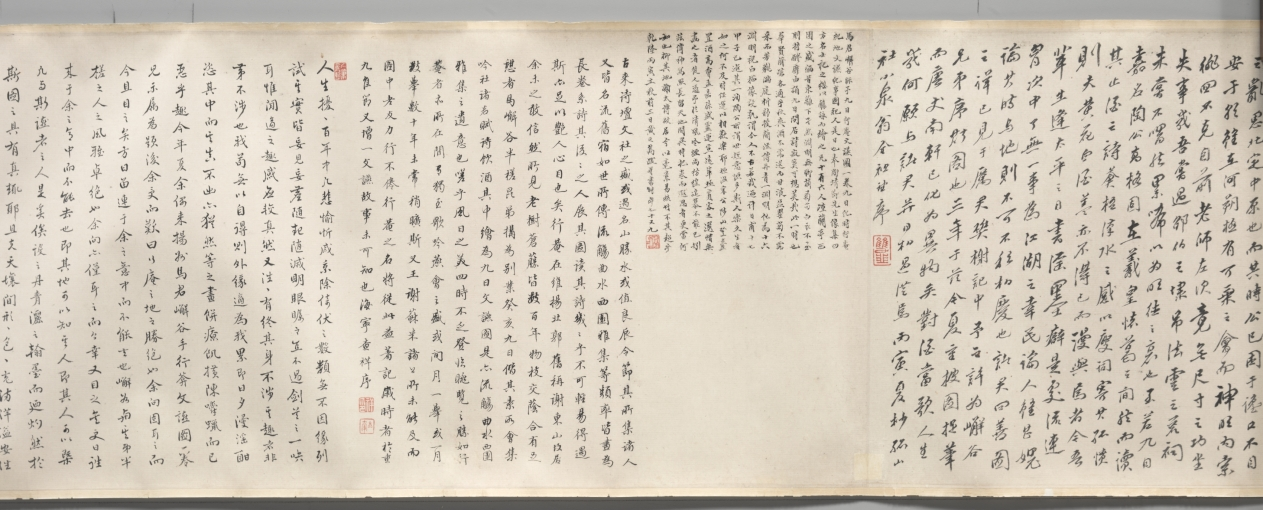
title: The Ninth Day Literary Gathering at Xing’an [Temporary Retreat]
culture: China, Qing dynasty (1644-1911)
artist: Fang Shishu (Chinese, 1693–1751)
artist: and Ye Fanglin (Chinese, active late 1600s–mid-1700s)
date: 1743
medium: Handscroll; ink and color on silk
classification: Painting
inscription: Fang Shishu's seal at beginning of painting: Ou ran shi de 偶然拾得. Ye Fanglin's seal at end of painting: Fanglin 芳林. Frontispiece title dated 1743 and 3 seals of Chen Bangyan 陳邦彦 (1678-1752).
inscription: 行庵在揚州北郭天寧寺西隅，馬君嶰谷半槎兄弟購僧房隙地所築，以為游息之處也。寺為晉謝太傅別墅。西隅饒古木，䨴鬱陰森，入林最僻，不知其近郛郭。庵居其中，無斲礱髤采之飾，惟軒庭多得清蔭，來憩者每流連而不能去。乾隆癸亥九日，積雨既收，風日清美，遂約同人，咸集於斯，中縣［懸］仇英白描陶靖節像，采黃花，酌白醪為供，乃以人世難逢開口笑，菊花雖插滿頭歸分韻賦詩。陶陶衎衎，觴詠竟日。既逾月，吳中寫真葉君敬［震］初適來，群貌小像，合為一卷，方君環山補景，命曰九日行庵文讌圖。裝池成，將各書所作於後，而囑鶚為之記。記按圖中共坐短榻者二人：右箕踞者，為武陵胡復齋先生期恆；左抱膝者，為天門唐南軒先生建中也。坐繩床者二人：中手牋者，歙方環山士庶；左仰首如欲語者，江都閔玉井華也。一人坐藤塾捻髭者，鄞全謝山祖望也。一人倚石坐若凝思者，臨潼張漁川四科也。樹下二人：離立把菊者，錢唐厲樊榭鶚；袖手者，錢唐陳竹町章也。一人憑石床坐撫琴者，江都程香溪先生夢星也。聽者三人：一人垂袖立者，祁門馬半查曰璐；二人坐瓷塾，左倚樹、右跂腳者，歙方西疇士疌 、汪恬齋玉樞也。二人對坐展卷者，左祁門馬嶰谷曰琯，右吳江王梅沂藻也。一人觀者，負手立於右，江都陸南圻鐘輝也。從後相倚觀者一人，歙洪曲溪振珂也。童子種菊者三人：樹間侍立者一人，撰杖、執卷者各一人。其植有蕉、有竹，又有雜樹，作丹黃青碧之色，紀時也。夫重九佳名，舉俗所重，而高常侍歎獨坐而搔首，陸天隨感登高以剫門，無其時地與人耳。今吾儕幸生太平，遇勝地，又皆素心有文之侶，固人世不可多得之會；而此十六人者，或土斷，或客游，聚散不常。異日者，歲月遷流，撫節物以有懷，一披此圖，悅如晤對。將來覽者，或亦不異此意乎。甲子夏五十有四日厲鴞記並書。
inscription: 揚州為江北大都會，居民連甍接楹，笙歌輿從，竟日喧聚，其於淸歌雅集，葢罕矣。城北天寧寺，為晉謝公駐節時所游息，其中有行庵，吾友馬君嶰谷、半查兄弟之小築也。地不踰五畝，而老樹古藤，森蔚相望，皆千百年物，間以修竹，春鳥秋蟲，更唱迭和，其間曲廊高榭，位置閑適。出門未數百步，即黃塵濁流極目，令人作惡。而此中獨蕭然有人外之思。乾隆八年九日，嶰谷兄弟招集同社一十四人祀陶公，出所藏仇實父白描像懸於閣上，各賦一詩。予方留滯西泠，未得預也。又踰旬而予至，諸君方擬繪圖記事，嶰谷曰：是不可無君。乃以展日更舉，令予得陪卷軸之末；而洪君曲溪，兩度皆以病失約，然故吟社中人也，亦補入焉。予太息謂諸君曰：謝公之風流，千古如在；然其游息於斯也，則與東山賓從之樂稍不同矣。公之為是行也，蓋以符氏之亂，思北定中原也。而其時公巳困於讒口，不自安於朝；雖在河朔極有可乘之會，而神明內索，徘徊不克自前。老師左次，竟無尺寸之功，坐失事幾。吾常過邵伯之埭，吊法雲之荒祠，未嘗不喟然累啼，以為明德之衰也。至若九日嘉名，陶公高格，固在羲皇懷葛之間；然而讀其 止酒之詩，蒼梧漢水之感，以瘦詞寄其孤憤則夫黃花白酒，蓋亦不得巳而漫與焉者。今吾輩生逢太平之日，書淫墨癖，是處留連，胸次中了無一事，為江湖之幸民，論人雖甚媿，論其時與地，則不可不私相慶也。諸君曰：善。圖之詳巳見於厲君樊榭記中。予之許為嶰谷兄弟序斯圖也，三年於茲；今夏重披圖捉筆，而唐丈南軒，巳化為異物矣。對酒當歌，人生幾何，願與諸君並日相遇從焉。丙寅夏杪孤山社小泉翁全祖望序。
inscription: 6 additional colophons and 15 additional seals: 1 colophon, dated 1746, and 1 seal of Huang Zhijun 黃之雋 (1668-after 1746); 1 colophon and 2 seals of Zha Xiang 查祥 (1718 jinshi); 1 colophon, dated 1746, and 3 seals of Zhang Siwen 張思問; 1 colophon, dated 1748, and 4 seals of Shao Dong 卲東 (1721 jinshi); 1 colophon, dated 1753, and 2 seals of Fang Shiju 方世舉 (signing as Fang Funan 方扶南); 1 colophon, dated 1808, of Ruan Yuan 阮元 (1764–1849); 3 seals unidentified.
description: By the 1700s, Yangzhou was flourishing both economically and culturally as the most prosperous city in China, having surpassed all other Jiangnan cities in their creation of gardens. This group portrait commemorates a literary gathering in the private garden of the salt merchants and art patrons Ma Yueguan (1688–1755) and his brother Ma Yuelu (1697–after 1766) in Yangzhou. Ma Yueguan received imperial recognition for providing financial aid and food relief for those affected by flood and drought. Ma Yueguan is seen seated at the end of the painting holding an open scroll while Ma Yuelu stands behind the qin instrument player. Among the guests were officials, scholars, poets, painters, and merchants, a mix of local members of a poetry club reflecting increasing social diversity.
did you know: The two hosts and their fourteen guests were all officials, scholars, poets, painters, and salt merchants.